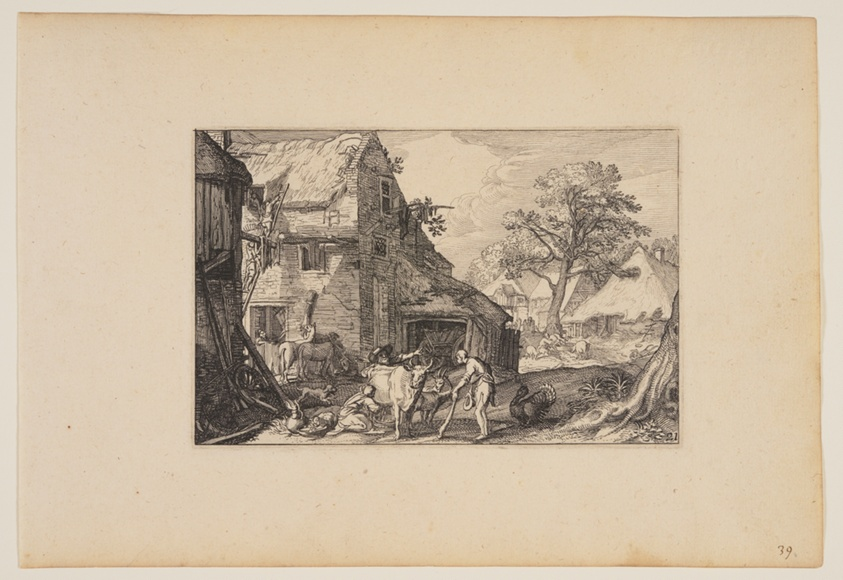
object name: Print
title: Farmyard, with Prodigal Son Among the Swine, from Landscapes (Verscheyden aerdige Lanthuysen...)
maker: Claes Jansz. Visscher (Netherlandish, c. 1550–c. 1612); after Abraham Bloemaert (Dutch, 1566–1651)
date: 1620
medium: Etching on ivory laid paper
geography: Netherlands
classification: print; paper; prints and drawing; etching